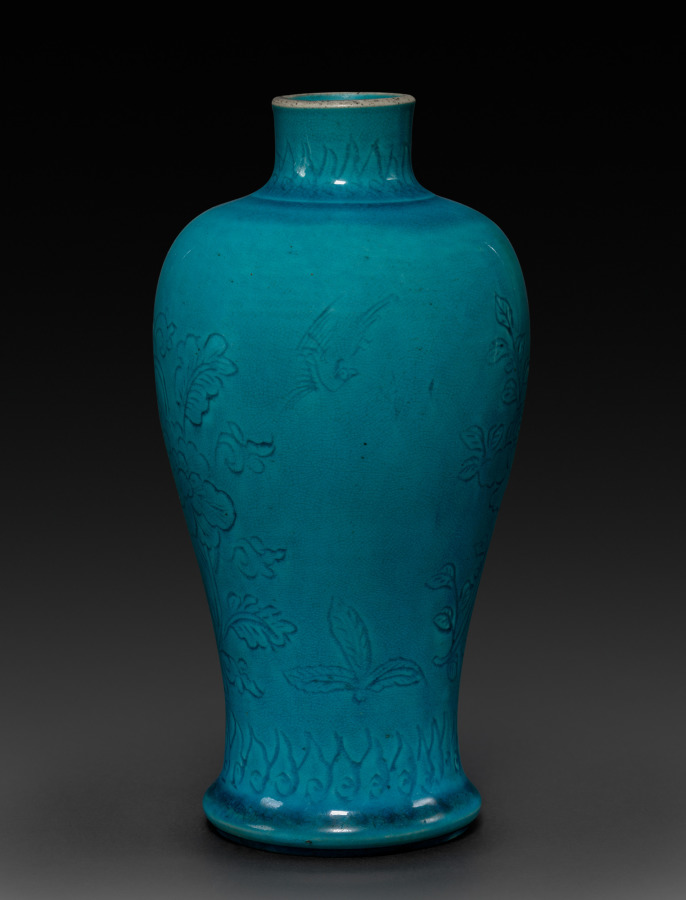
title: Vase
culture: China, Qing dynasty (1644-1911), Kangxi reign (1662-1722)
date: 1662–1722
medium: porcelain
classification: Ceramic